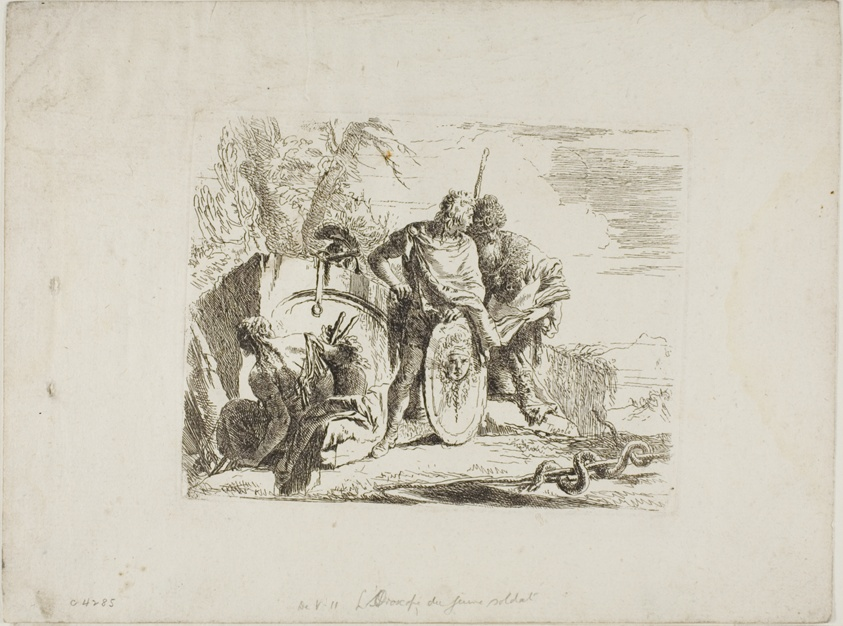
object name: Print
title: The Astrologer and the Young Soldier, from Capricci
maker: Giovanni Battista Tiepolo (Italian, 1696–1770)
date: 1740/50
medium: Etching on paper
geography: Italy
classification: etching; print; prints and drawing